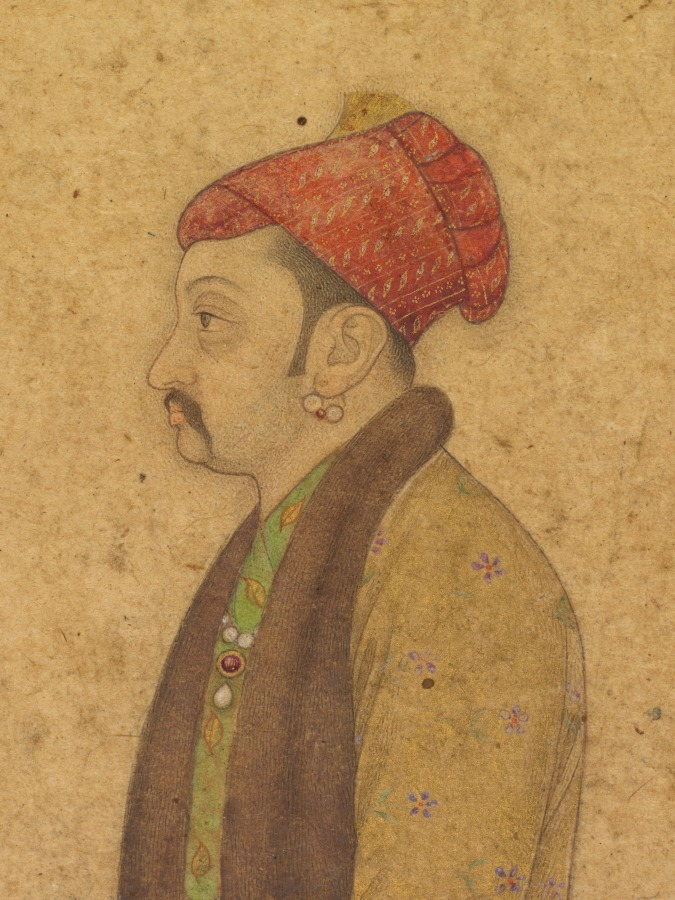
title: Portrait of Raja Ram Singh of Amber (r. 1667-1688) with a Deccan Sword (recto)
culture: India, Mughal, 17th century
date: c. 1680–85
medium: Gum tempera and gold on paper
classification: Painting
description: The sensitive, naturalistic rendering of weariness and forbearance in the face belies the trappings of favor bestowed on Ram Singh by the Mughal emperors Shah Jahan and Alamgir, whom he served as courtier and general between 1643 and 1688. He was a Hindu ruler from the kingdom of Amber in Rajasthan, under the control of the Mughal empire. Spending most of his life at the imperial court or leading military expeditions for the Mughals, this portrait was included in a Mughal album and inscribed with an Urdu verse indicating his value to the empire: "wherever he has led an expedition, victory is his." He wears a sumptuous coat of honor with a fur collar, woven with gold threads and floral sprigs and costly rubies, emeralds, and pearls. The straight sword with enameled hilt may be the one gifted to him by the emperor upon his succession to the throne as king of Amber in 1667. His long history of service at the imperial court, however, was checkered with troubles, including his allegiances with failed successors of Shah Jahan and the escape of the rebel Shivaji under his watch.